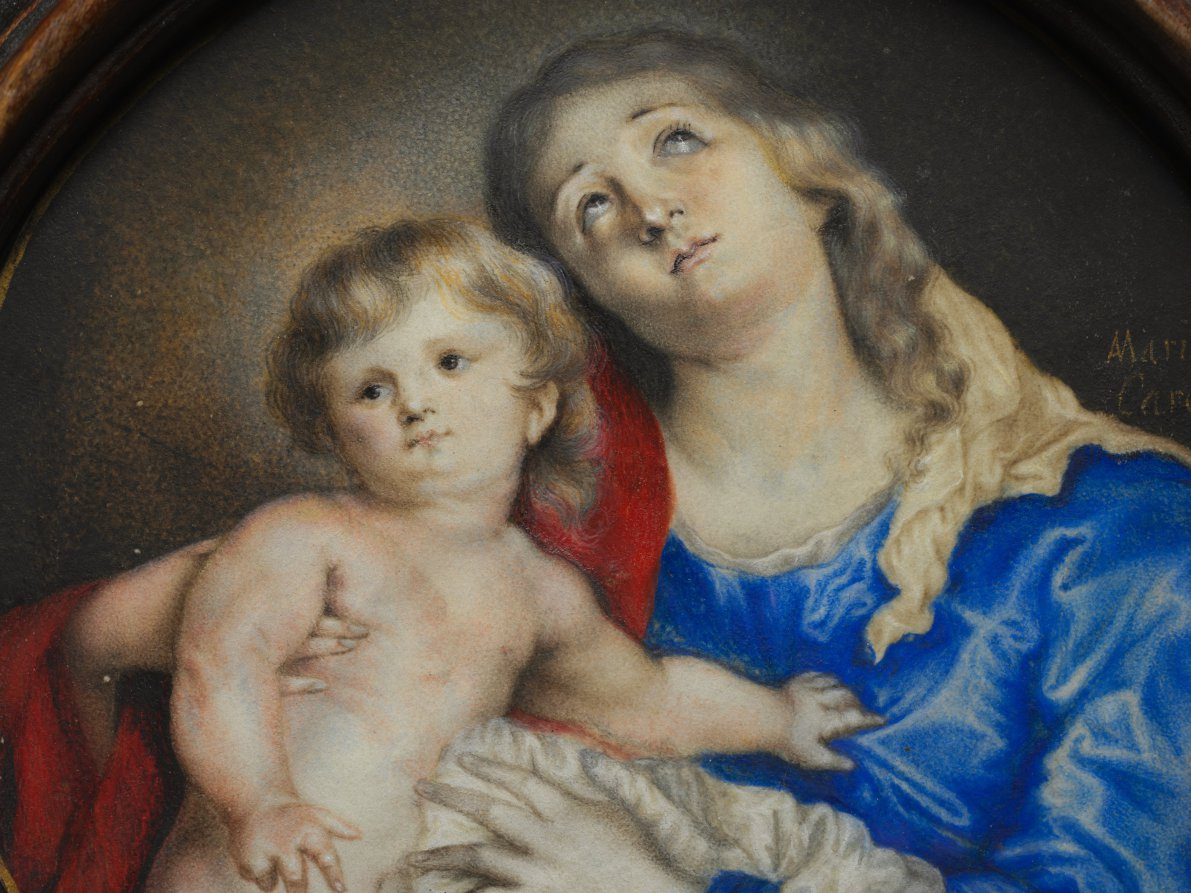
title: Virgin and Child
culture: England, 17th century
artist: Anna Maria Carew (British)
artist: after Anthony van Dyck (Flemish, 1599–1641)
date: c. 1662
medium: watercolor heightened with gum on vellum, with gold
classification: Portrait Miniature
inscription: signed at right center: "Maria Carew / fect"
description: Larger in size than most portrait miniatures, the Madonna and Child by Anna Maria Carew is a cabinet miniature, or a small work on vellum, enamel, or ivory that copies a full-scale oil painting. In this case the original painting was by Flemish artist Anthony van Dyck, and engraved by Paulus Pontius around 1630 shortly after it was painted. As a cabinet miniature, this work is somewhat unusual because of its religious subject and its simplicity. Cabinet miniatures tended instead to reproduce paintings of dramatic subjects and climactic moments in myths or religious stories. They could be hung on the wall or stored in elaborate and specially designed furniture, and they were often displayed in the smaller, more private rooms of a house.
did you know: King Charles II awarded Carew an annual pension to copy in miniature from the royal collection.